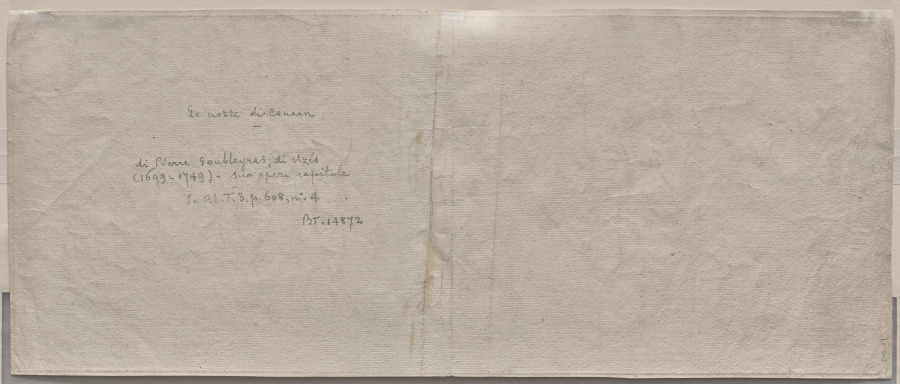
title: The Banquet in the House of Simon the Pharisee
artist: Pierre Subleyras (1699–1749)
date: 1738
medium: Etching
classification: Print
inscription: Watermark: fleur-de-lis in a single circle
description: Subleyras based this etching on his own painting of the same subject, commissioned by the Order of Saint John Lateran for the dining room of their monastery in Asti, Italy. The lively banquet scene includes an episode from the Gospel of Luke in which Simon the Pharisee, a Jewish religious leader, invites Christ to have dinner with him. During the meal, a notoriously sinful woman enters the feast, washes Christ’s feet with her tears, and dries them with her hair. Subleyras placed Christ and the woman at the far right end of the table, where Simon leans over them, wondering why Christ would let a sinful woman touch him.